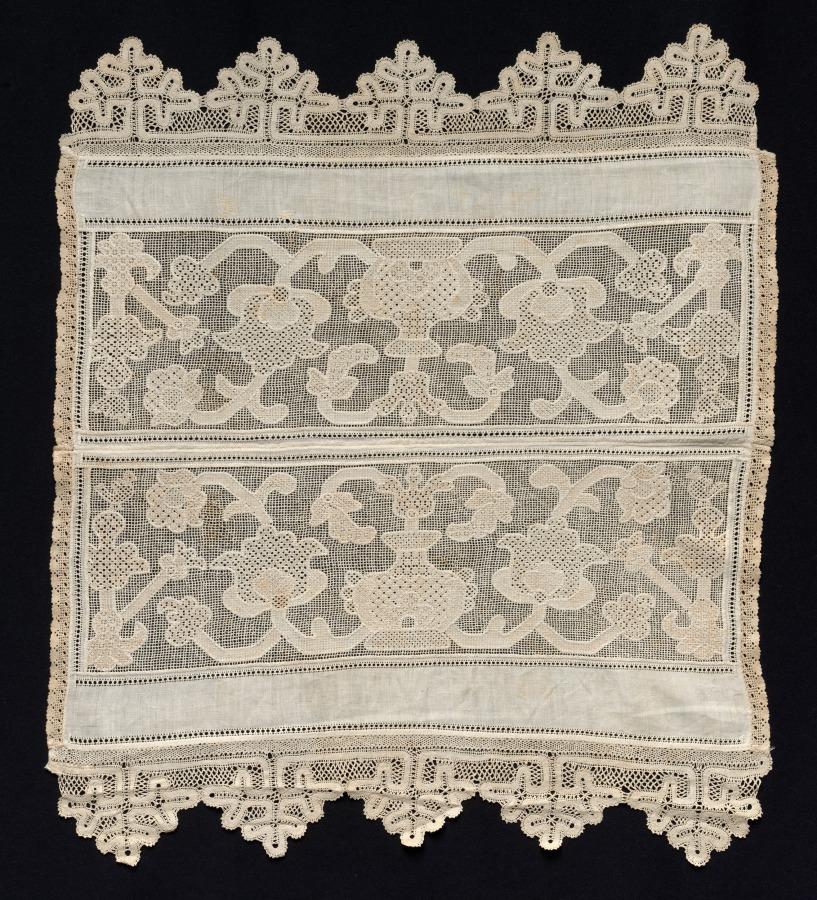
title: Joined Towel Ends with Floral Motifs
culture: Russia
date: 1800s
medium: Linen: needle lace (cutwork and drawnwork), straight (continuous) bobbin lace, (tape lace) edging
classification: Lace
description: The tradition of stylized floral motifs in Russian lace originates in Flanders: Russian lace makers were inspired by the floral designs of tulips and carnations popular in Flemish lace.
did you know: The demand for Russian lace grew rapidly after it was first displayed at the 1873 World Fair in Vienna.